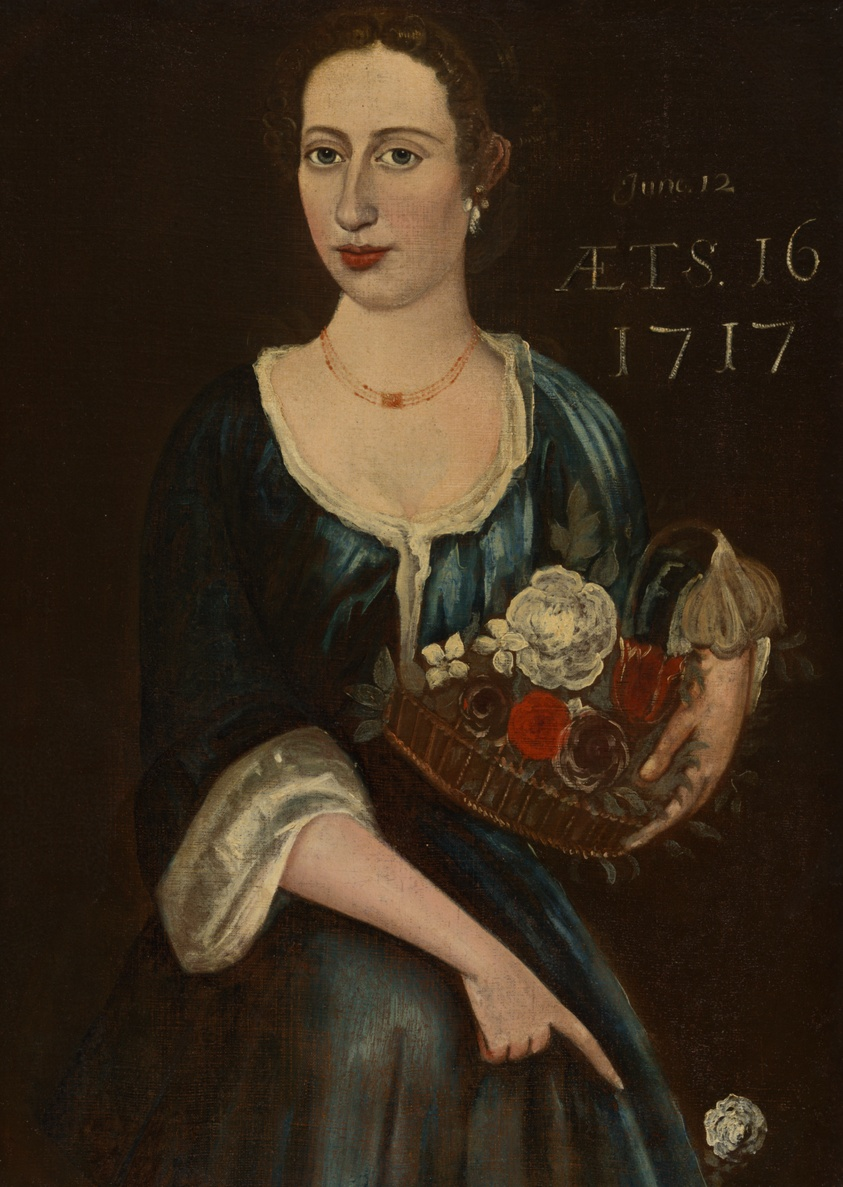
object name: Painting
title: Miss Vanderveer, or Miss Vandeveer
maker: Artist unknown (American, 18th century); Formerly attributed to John Watson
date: 1717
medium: Oil on canvas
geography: United States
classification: painting; american arts